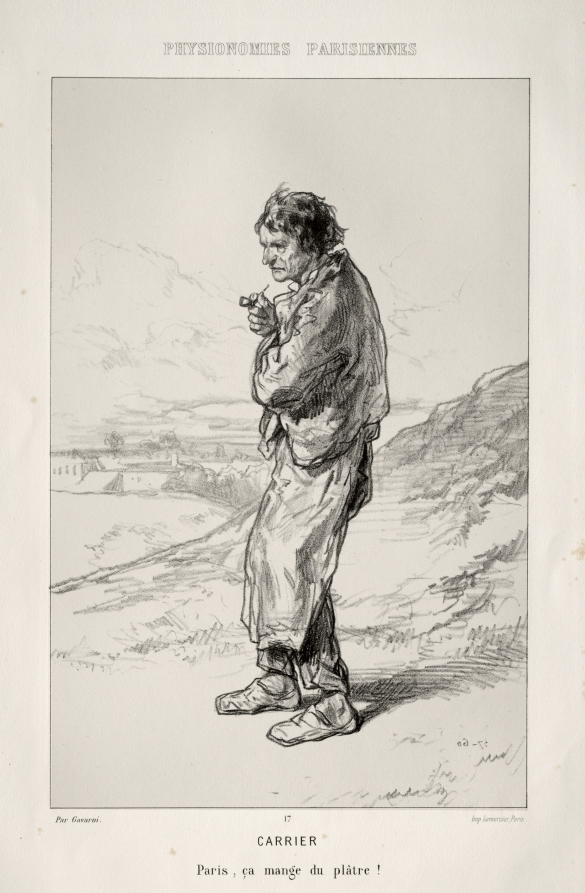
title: Carrier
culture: France, 19th century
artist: Paul Gavarni (French, 1804–1866)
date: c. 1857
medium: lithograph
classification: Print